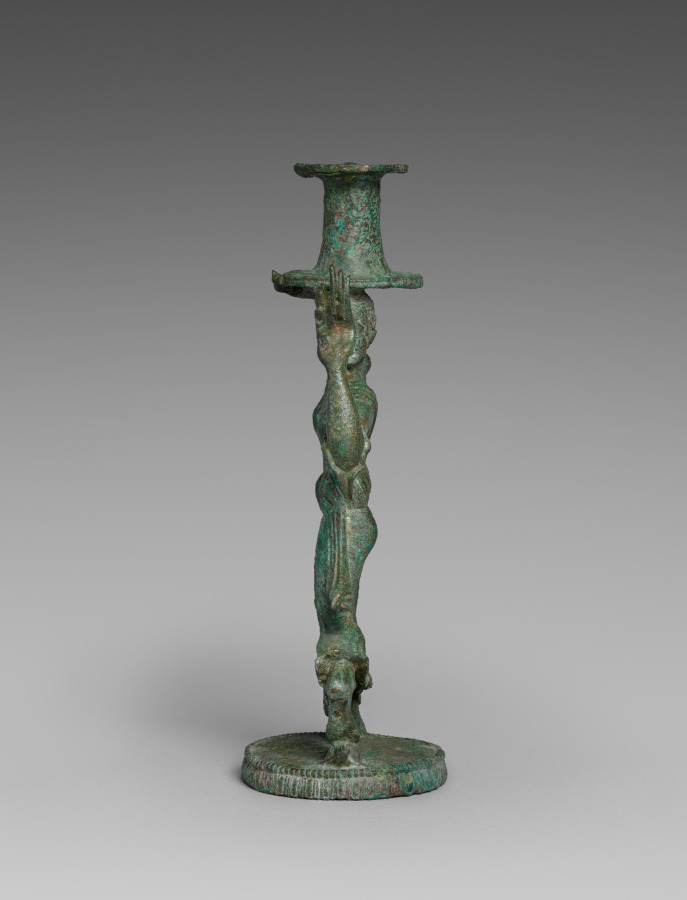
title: Candelabrum Stand of a Dancing Maenad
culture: Etruscan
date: 525–500 BCE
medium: bronze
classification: Sculpture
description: Conceived primarily in two dimensions—front and rear silhouette—this small bronze dancer probably once belonged to an elaborate candelabra or incense burner. The exaggeratedly long fingers and pointed shoes characterize the work as Etruscan, as do the stylized folds of the figure’s dress, which add visual interest but not verisimilitude. While her right hand holds above her head a cylindrical support, her left squeezes a small object, perhaps a fruit or clapper.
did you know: A small turtle beneath the figure’s back foot suggests a rustic setting.